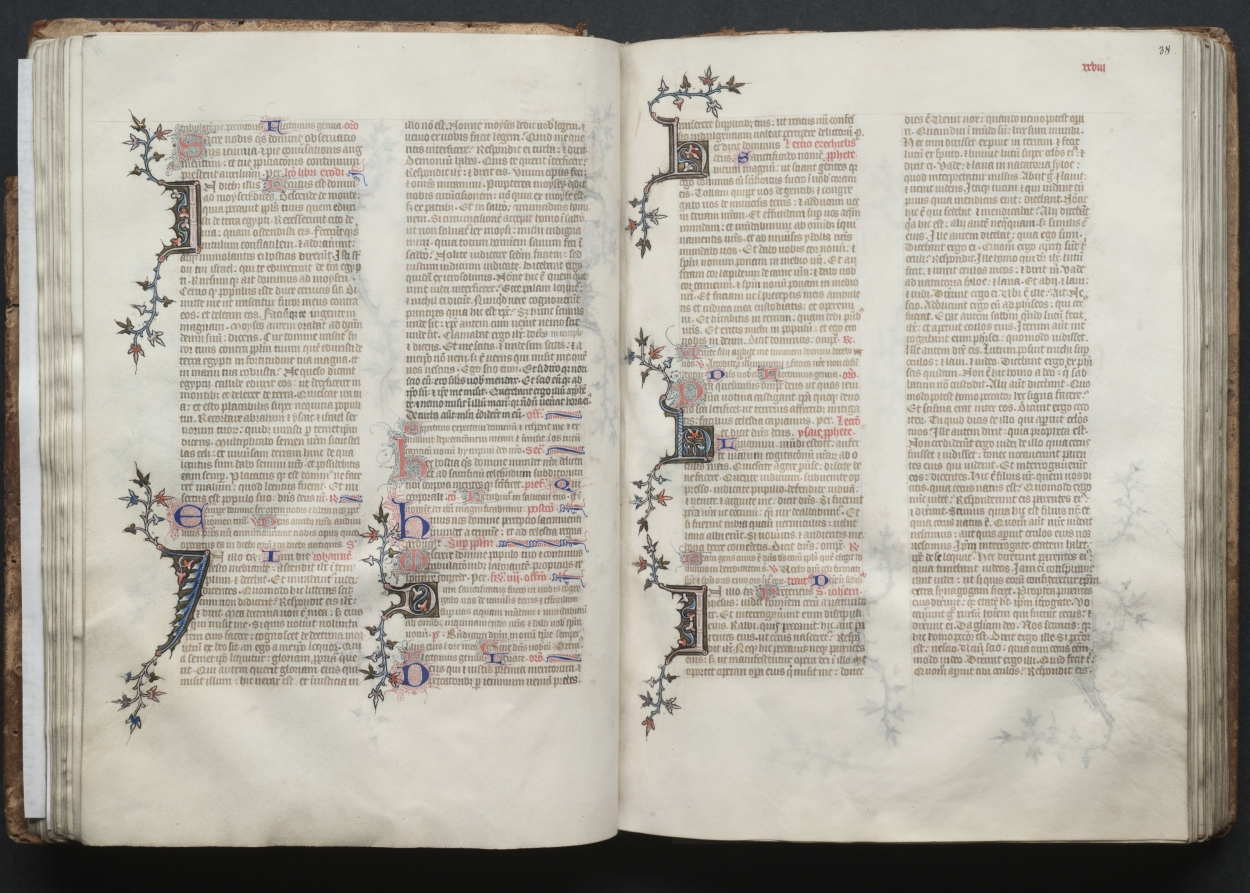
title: The Gotha Missal: Fol. 38r, Text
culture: France, Paris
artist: Master of the Boqueteaux (French)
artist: and Workshop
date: c. 1375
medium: ink, tempera, and gold on vellum; blind-tooled leather binding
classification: Bound Volume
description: The style and quality of this manuscript's decoration is typical of deluxe Parisian books made for aristocratic or royal patrons. Most of the book's decoration appears to be the work of the Master of the Boqueteaux, an artist active at the court of King Charles V (died 1380). His style was apparently shared by a number of book illuminators working in and around Paris. It is very possible that the Gotha Missal belonged to Charles V, but is not provable because the manuscript has no royal portraits and lacks a colophon. Given the book's magnificent decoration, however, it would seem that it was produced for a Valois prince, if not for the king himself. The manuscript receives its name from the German dukes of Gotha, its later owners.